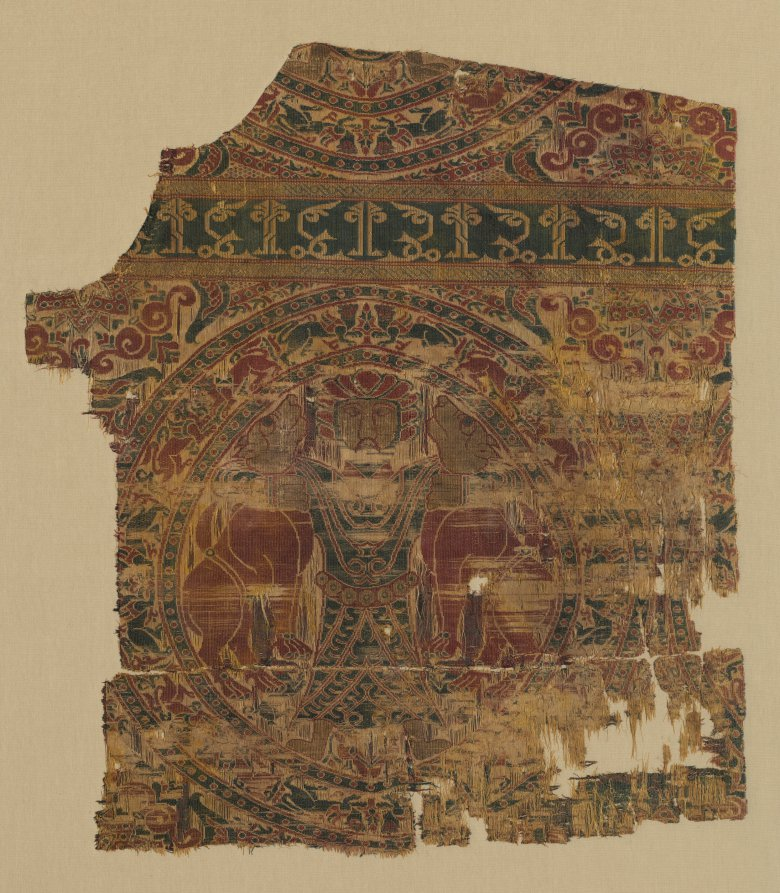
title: Fragment with Lion Strangler from a Dalmatic of Saint Bernard Calvo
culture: Spain, Almeria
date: 1200–1243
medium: Silk and gold thread: lampas, taqueté, and plain-weave variant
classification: Textile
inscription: the inscription (incorrectly written) appears to read "al-'amir" (command, i.e. authority) [alternately retrograde and vice versa].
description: Within the elaborate roundel, a bearded man with a belted tunic strangles a lion in each hand. Gold thread shimmers on their heads and his hands. In the inscription band across the top, an Arabic word has been written with mirror-image symmetry. It can be read as al-yumn, primarily translated as prosperity. The central motif of this renowned silk is a pre- Islamic Persian symbol of royal power. Both Muslims and Christians throughout the Iberian Peninsula admired such textiles. Members of the Catholic clergy incorporated it into a dalmatic—a long ceremonial tunic. It was found in the late 1800s in the tomb of Saint Bernard Calvo, Bishop of Vich (1180–1243).